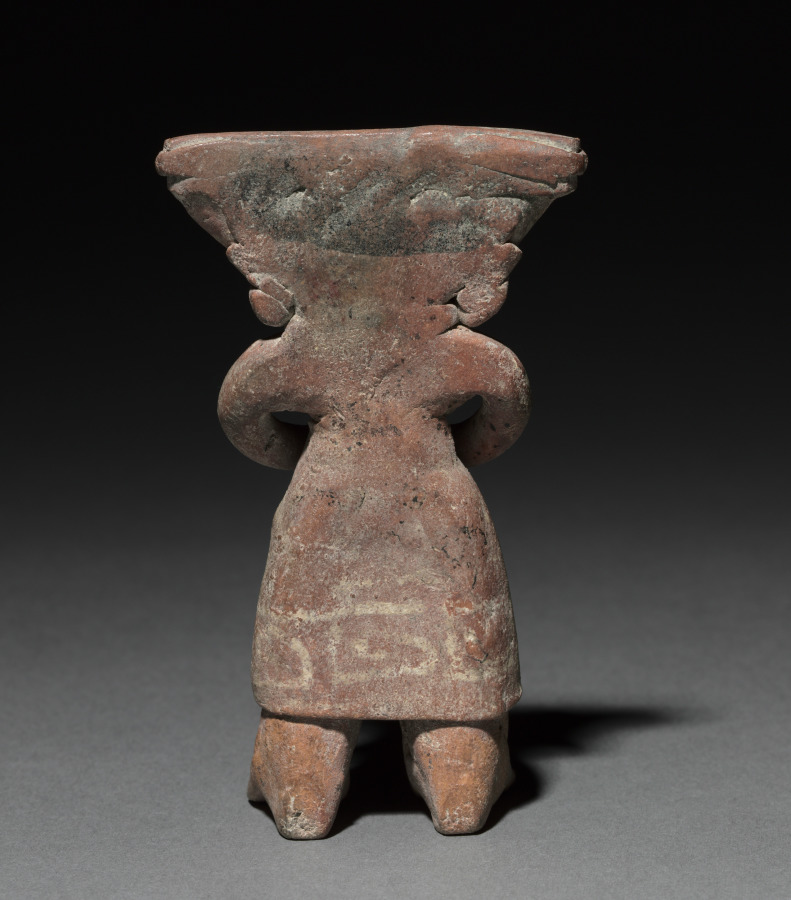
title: Standing Figurine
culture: Mesoamerica, West Mexico, Michoacán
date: 200 BCE–300 CE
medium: ceramic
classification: Ceramic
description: Clay figurines were the earliest and most common art form in Mexico and other countries in the ancient Mesoamerican (Middle American) culture region. Made first by hand and later with molds, most figurines belong to the traditions of commoners, such as farmers, rather than those of elites.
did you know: Clay figurines were the earliest and most common art form in the ancient Mesoamerican culture region.